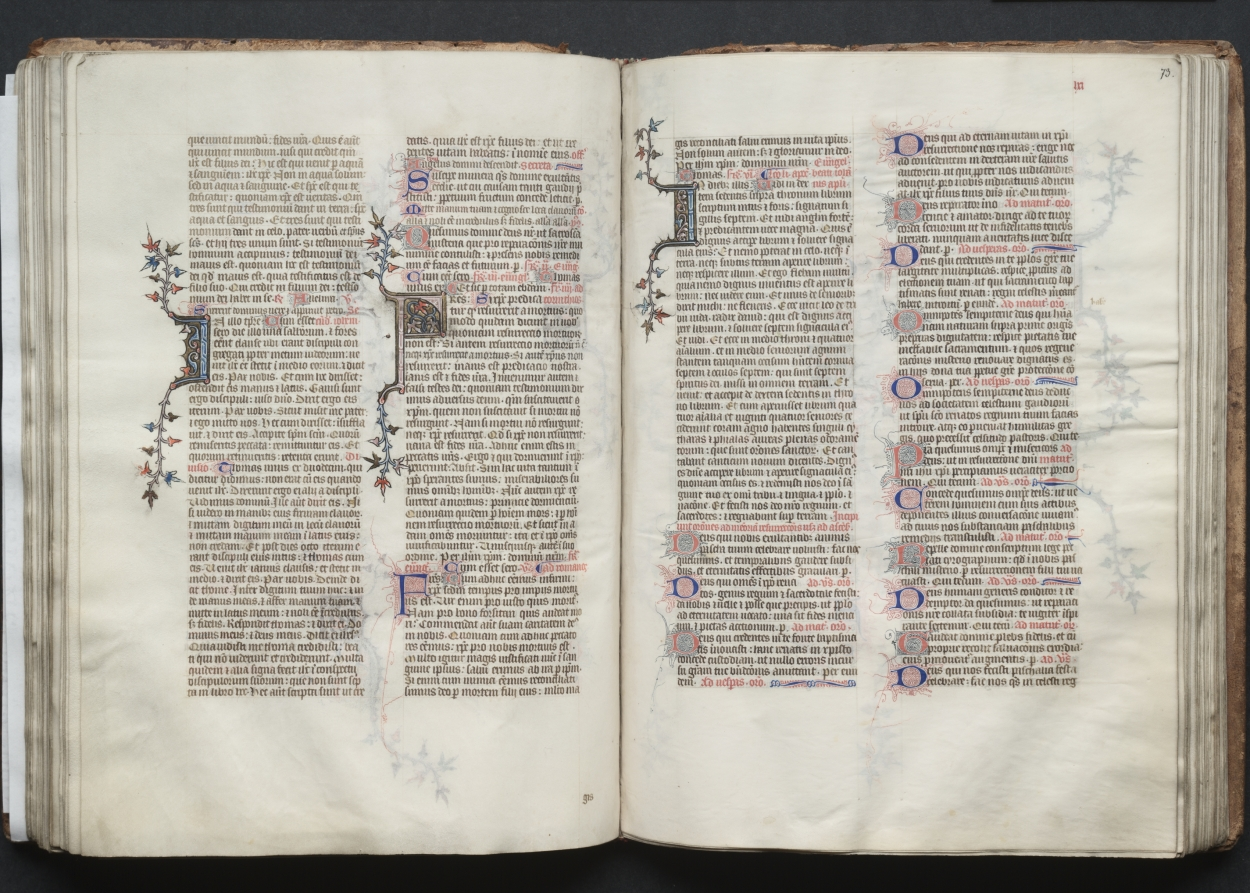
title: The Gotha Missal: Fol. 73r, Text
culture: France, Paris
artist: Master of the Boqueteaux (French)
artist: and Workshop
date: c. 1375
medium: ink, tempera, and gold on vellum; blind-tooled leather binding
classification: Bound Volume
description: The style and quality of this manuscript's decoration is typical of deluxe Parisian books made for aristocratic or royal patrons. Most of the book's decoration appears to be the work of the Master of the Boqueteaux, an artist active at the court of King Charles V (died 1380). His style was apparently shared by a number of book illuminators working in and around Paris. It is very possible that the Gotha Missal belonged to Charles V, but is not provable because the manuscript has no royal portraits and lacks a colophon. Given the book's magnificent decoration, however, it would seem that it was produced for a Valois prince, if not for the king himself. The manuscript receives its name from the German dukes of Gotha, its later owners.